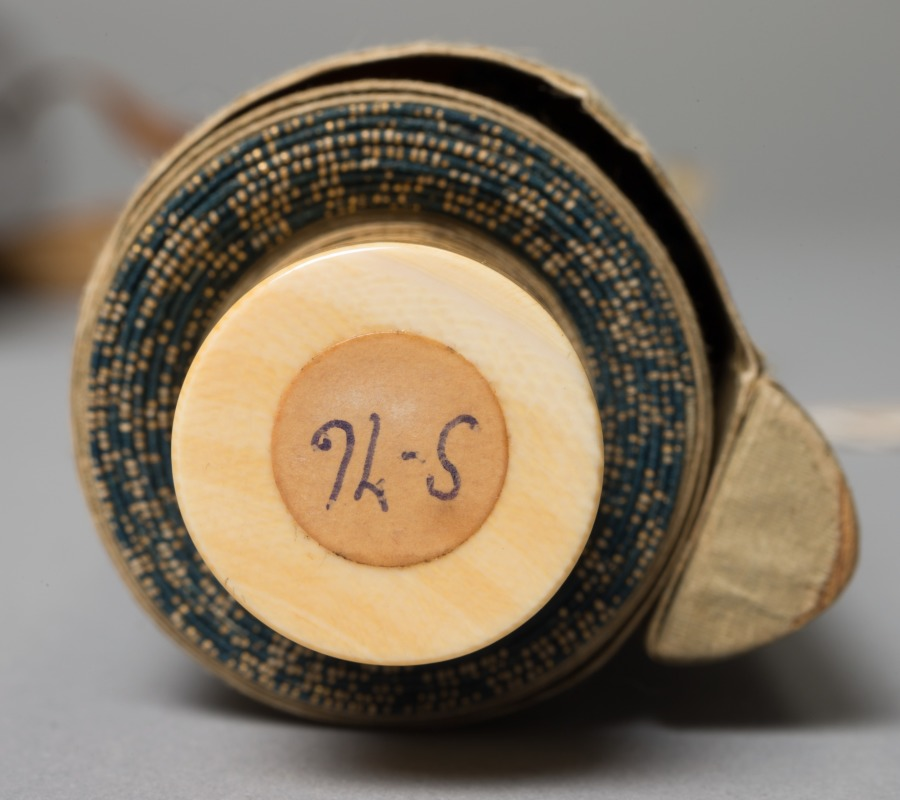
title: Seated Priest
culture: Japan, Momoyama period (1573-1615) to Edo period (1615-1858)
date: late 1500s-1650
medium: hanging scroll; ink on paper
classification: Painting